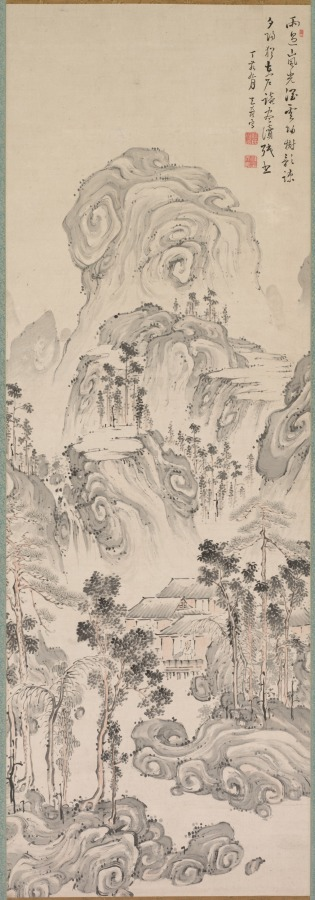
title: Landscape with Gentle Peaks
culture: Japan, Edo period (1615–1868)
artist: Kan Tenju (Japanese, 1727–1795)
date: 1767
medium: hanging scroll; ink and light color on paper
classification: Painting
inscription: 雨過嵐光煙／雲陽樹影諫／夕陽独在左／？卷讀残書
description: A figure sits in a retreat tucked into the mountains near a waterfall. The painter, Kan Tenju, was best known as a calligrapher and seal carver. Of Korean heritage, he was a patron of artist Ike Taiga (池大雅) (1723–1776), and a cousin of Taiga’s student Aoki Shukuya (青木 夙夜) (died 1802). His Chinese-style poem reads as follows: Smoky mist in the mountain reflects light after the rain, Sunlight passes through the clouds to cast shadows of the trees, Alone in the sunset, I read a well-worn book.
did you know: This painting combines image and calligraphy, connected by skillful brushwork.